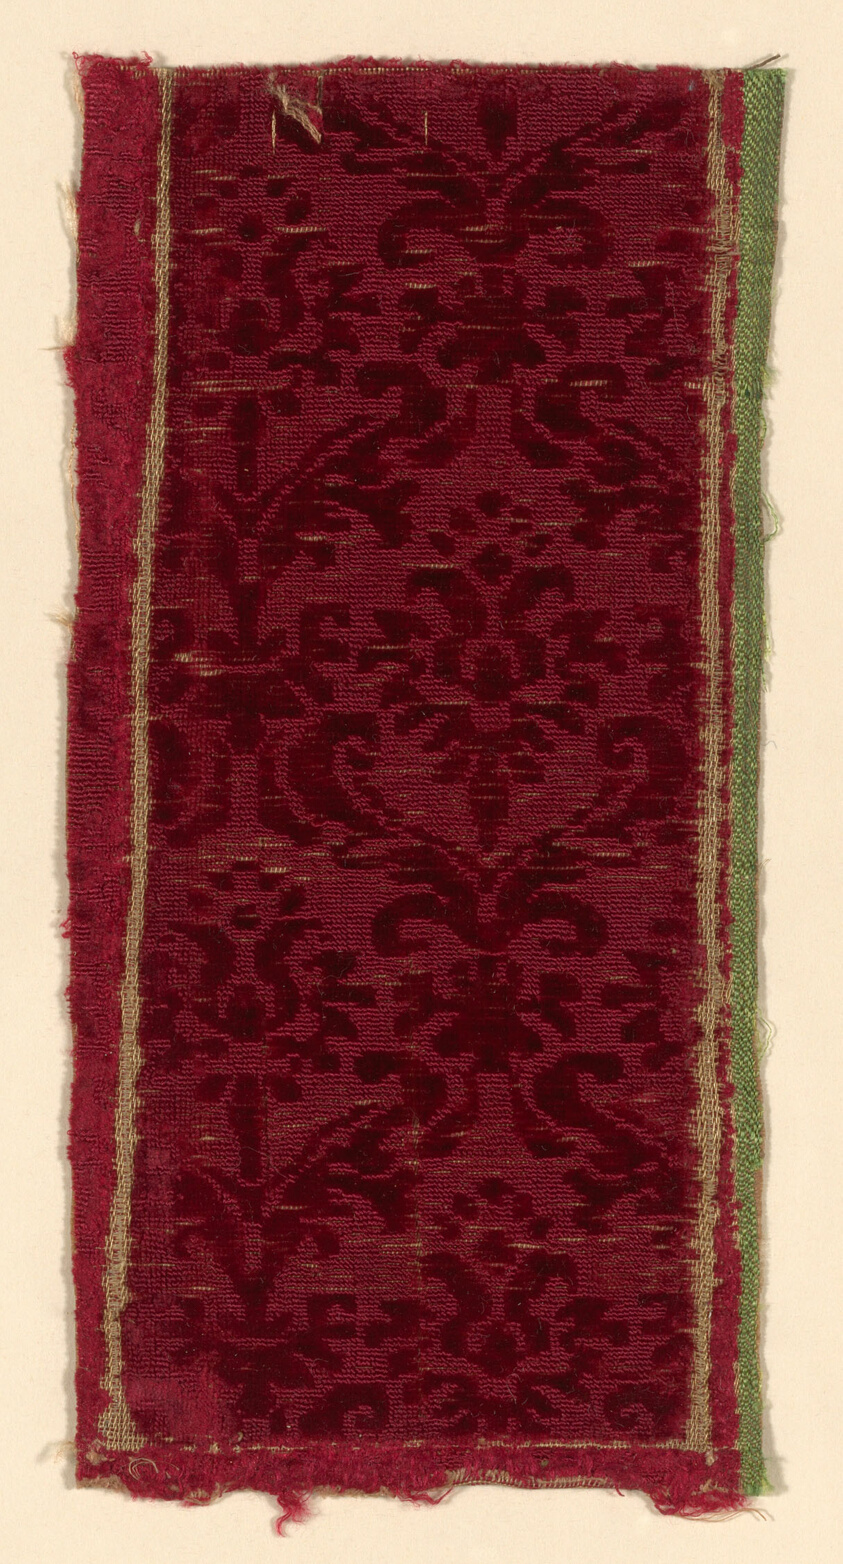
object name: Textile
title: Fragment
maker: Italy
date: 1575/1600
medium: Silk, cut and uncut velvet weave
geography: Italy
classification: textile; weaving - velvet; weaving